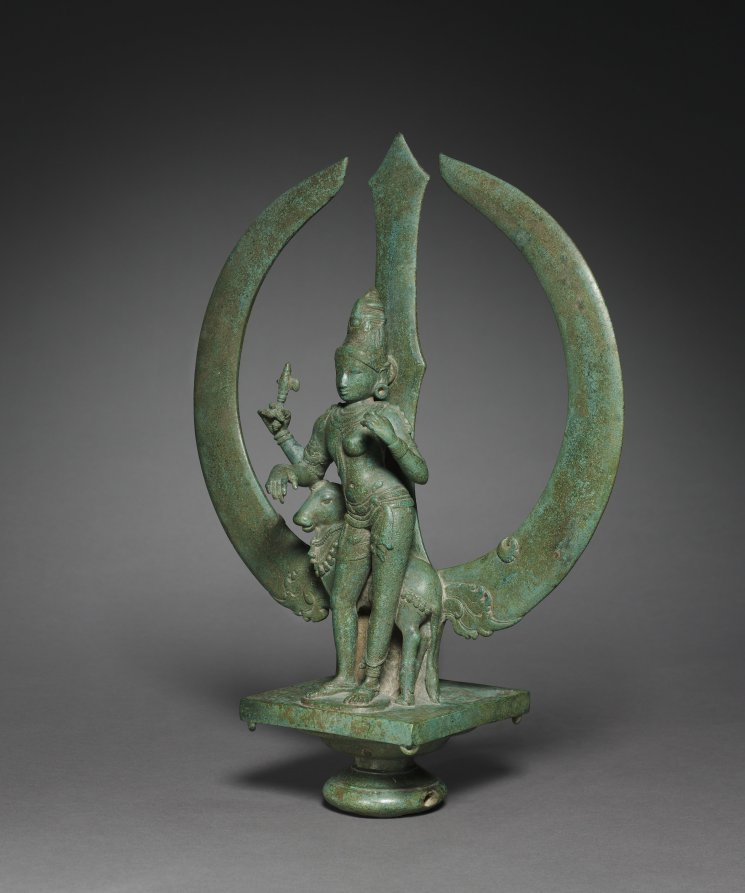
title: Trident with Shiva as Half-Woman (Ardhanarishvara)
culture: South India, Tamil Nadu, Chola period (900-13th Century)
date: c. 1050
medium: bronze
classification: Sculpture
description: The form of the trident—the main weapon of the Hindu god Shiva—dramatically and elegantly encircles his form in which the left side is female and the right side is male. The male side has the matted locks of a yogi piled high on his head; he holds an ax and leans on his mount, the bull. The female side has a jeweled crown, earring, full breast, broad hips, long skirt, and only one arm. The lower hands probably held a stringed instrument. This particular iconic form of Shiva visually indicates that he embodies all phenomena, even if they seem contradictory. He is male and female, destructive and creative, yogi and royal sovereign, hunter and musician.